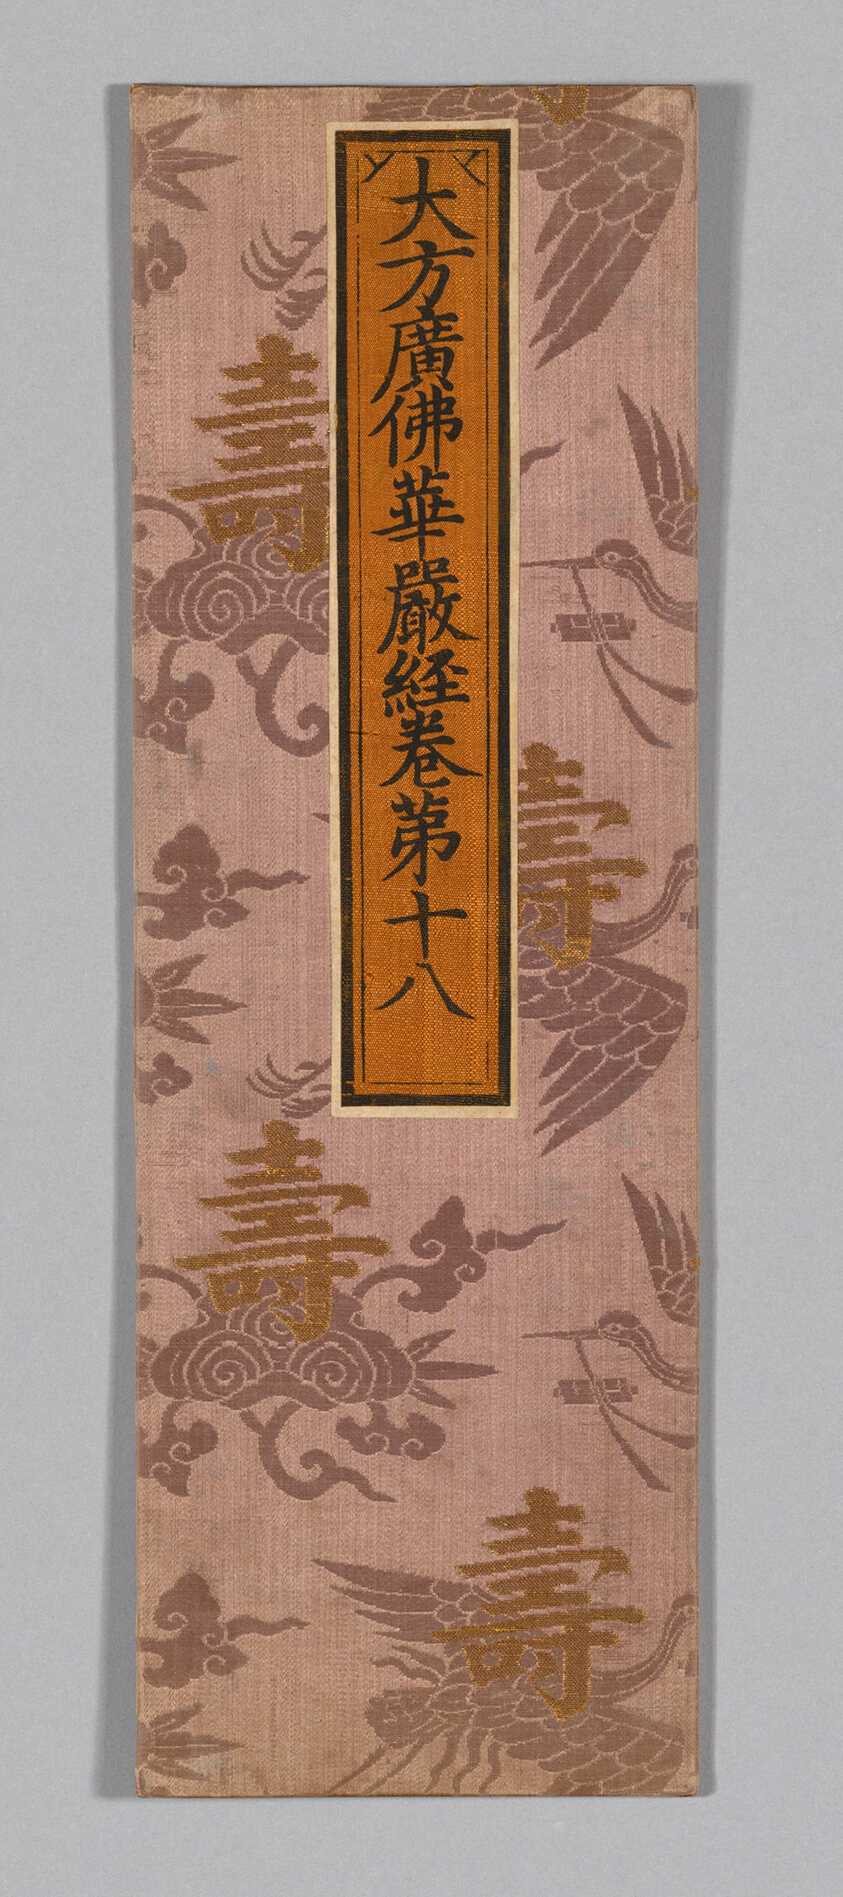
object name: Textile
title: Sutra Cover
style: ming, Chinese (culture or style), East Asian, asian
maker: China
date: Ming dynasty (1368–1644), c. 1590's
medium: Silk and gold-leaf-over-lacquered-paper strip, wrapped silk, 4:1 satin damask weave with supplementary patterning weft bound in weft-float faced 1:4 satin interlacings; label: silk, plain weave; painted with ink; glued to paper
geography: China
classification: textile; weaving